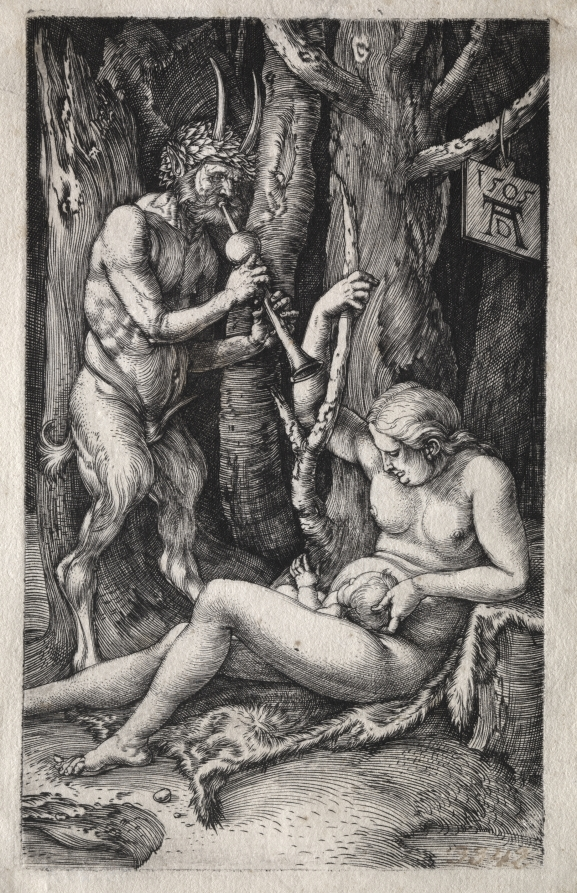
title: The Satyr Family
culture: Germany, early 16th Century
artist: Albrecht Dürer (German, 1471–1528)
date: 1505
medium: engraving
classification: Print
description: Dürer’s interest in mythological imagery stemmed from his familiarity with the Italian Renaissance. In this ambiguous engraving, Dürer depicted a satyr-a hybrid woodland creature typically associated with lust-in the role of father and family man. Instead of carousing in the forest, he plays music to his newborn child. Dürer’s play on the mother and child theme and the satyr’s unconventional fatherly behavior draws attention to a primal and simplified way of life. In contrast though, the group rests within an inhospitable dense forest where tops of trees are splintered and branches are dead, implying that the figures’ relaxed instinctual approach toward procreation and sexuality remains outside the bounds of Christian virtue.